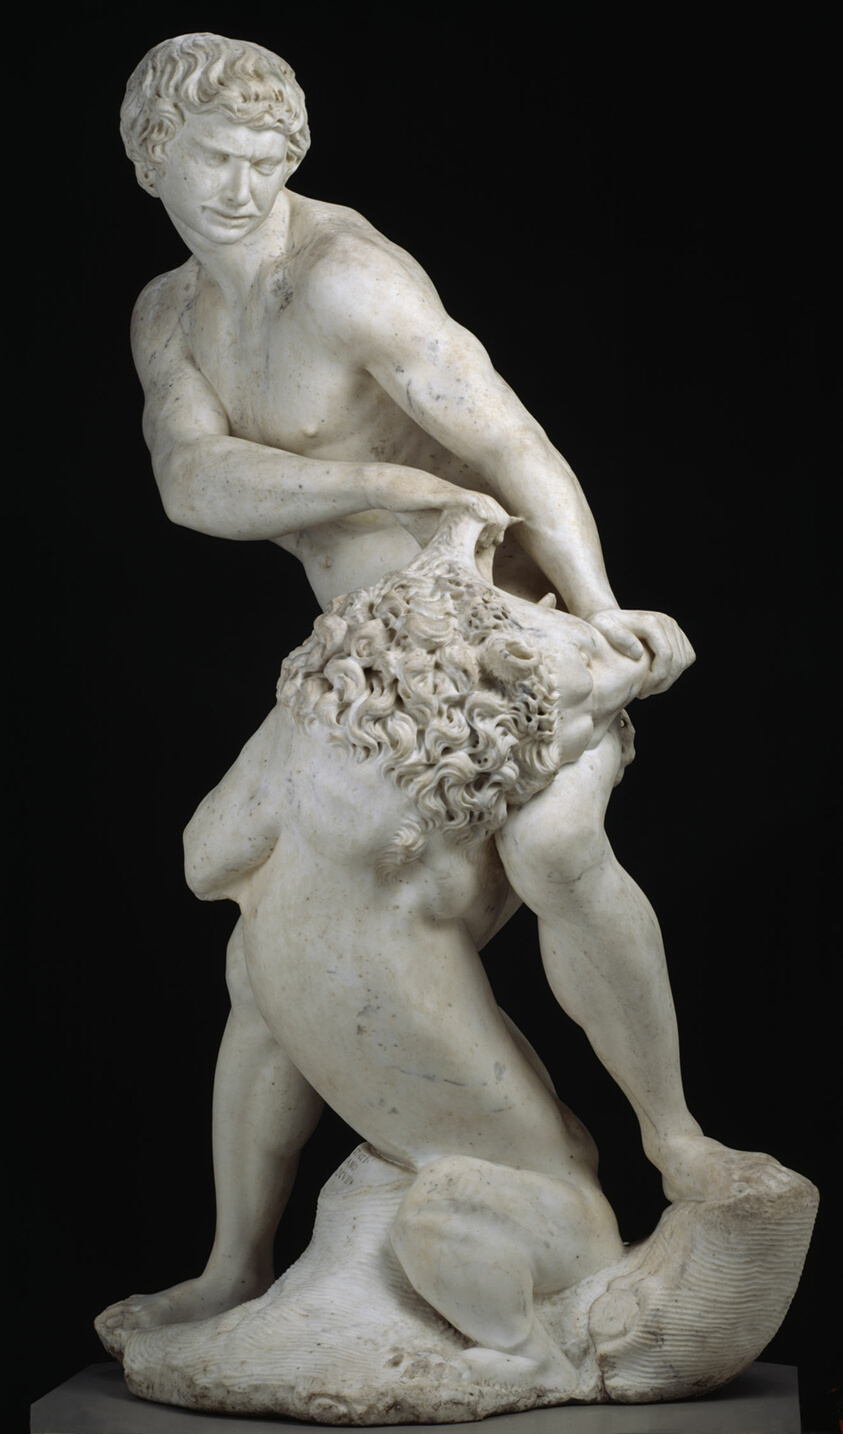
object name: Sculpture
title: Samson and the Lion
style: 17th Century, Baroque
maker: Cristoforo Stati (Italian, 1556–1619)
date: 1604–7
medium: Marble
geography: Italy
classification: large scale; sculpture; Italian; marble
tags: religious, Old Testament, religious scenes, nudes, man, figure, biblical, animals, lions, religious figures